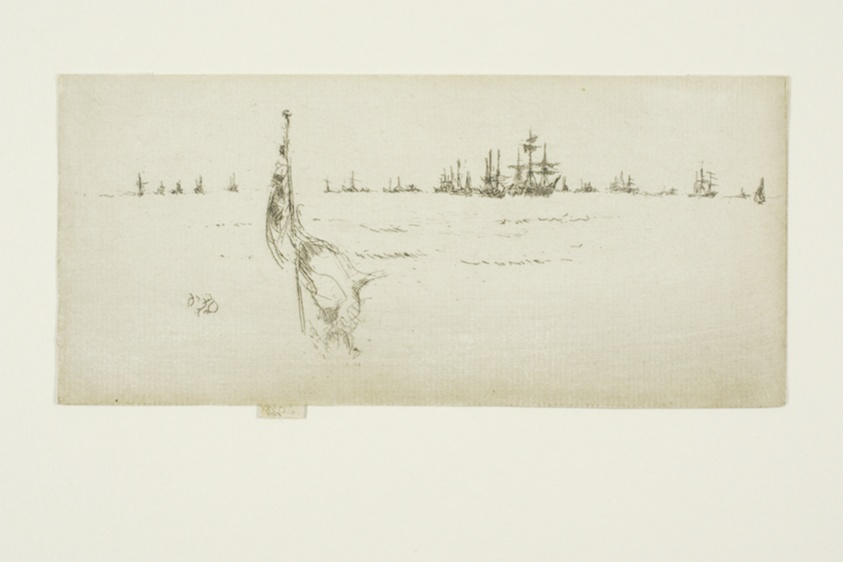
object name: Print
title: Dipping the Flag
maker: James McNeill Whistler (American, 1834-1903)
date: 1887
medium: Etching and drypoint in black ink on cream laid paper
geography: United States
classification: etching; drypoint; print; prints and drawing; paper